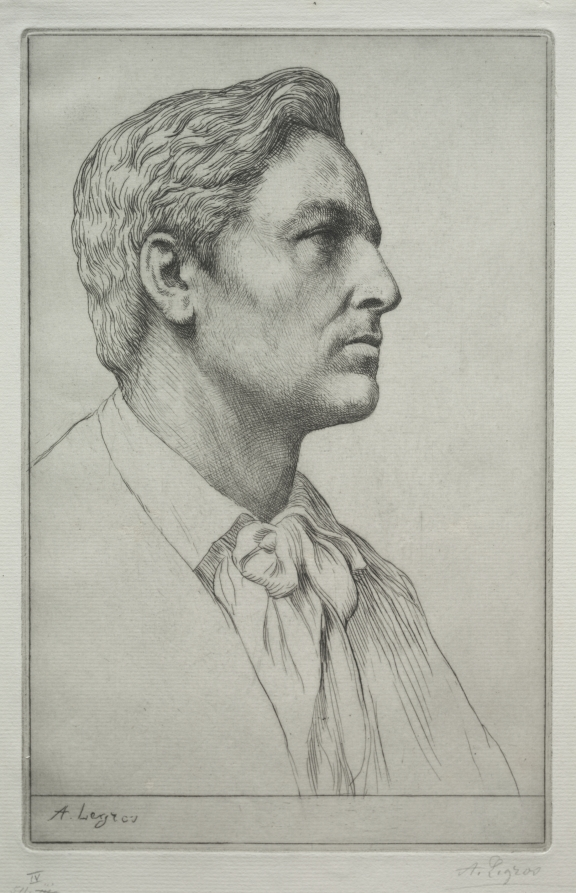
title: Portrait of Sir Charles Holroyd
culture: France, 19th century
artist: Alphonse Legros (French, 1837–1911)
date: c. 1857–1911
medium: drypoint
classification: Print